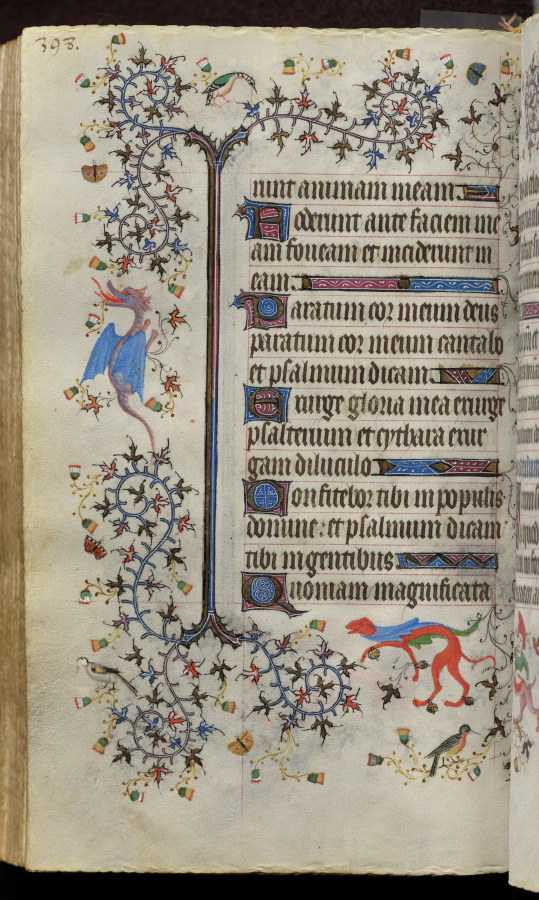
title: Hours of Charles the Noble, King of Navarre (1361-1425): fol. 193v, Text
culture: France, Paris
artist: Master of the Brussels Initials and Associates (French)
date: c. 1405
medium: ink, tempera, and gold on vellum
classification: Bound Volume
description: This precious volume was obviously highly prized by its owner, the French-born King of Navarre, who had his coat of arms painted on no less than twenty folios. Rather than directly commissioning this manuscript from a specific workshop, it seems that Charles the Noble acquired his book of hours -- perhaps ready-made for the luxury market -- while on a trip to Paris in 1404-05. A collaborative effort, six painting styles are evidenced within the pages of this codex, those of two Italians, two Frenchmen, and two Netherlanders. The painter who was responsible for the planning and decoration of the book, and who produced seventeen of the large miniatures, was a Bolognese artist known as the Master of the Brussels Initials. His principal assistant, responsible for most of the borders, was a Florentine who signed his name "Zecho" da Firenze on folio 208 verso.